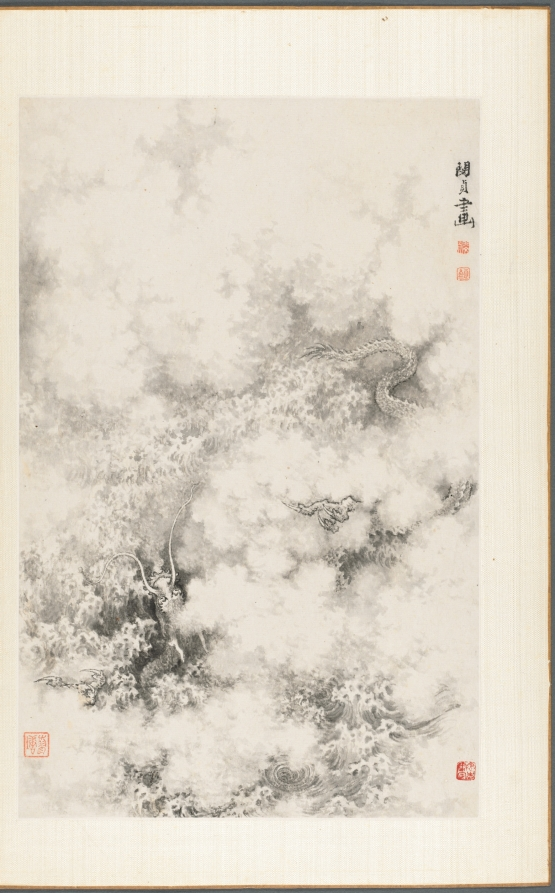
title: Dragon amid Clouds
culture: China, Qing dynasty (1644-1911)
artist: Min Zhen (Chinese, 1730–after 1788)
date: 1788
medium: album leaf, ink on paper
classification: Painting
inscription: Inscription by Min Chen on the last leaf: I have a habit of collecting strange rocks. My friend Tai-li shan-jen* treasures my paintings as much as I treasure strange rocks. Once we agreed to exchange what we love with each other. However, my busy activities have kept me from carrying this out. This summer I realized that this strange rock has been sitting in my studio for five years, so I painted this to fulfill my old promise. As a record, I chose the grotesque cliff in the last scene of this twelve-leaf album. Cheng-chai, Min Chen inscribed this on the sixth day of the sixth month [July 9] of the wu-shen year [1788]. * Tai-li shan-jen is Wang Li [tzu: Li-fu] tr. Hou-mei Ishida Six seals appearing on the leaves: Min Chen, Cheng-chai, Ching-ch'iao, Chen, Liao-t'ang, Min Chen chih-yin.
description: Min Zhen, who was orphaned at age 12 and developed an eccentric personality, was trained by Tang Yin (1682–1756), a writer, playwright, and superintendent of the imperial porcelain workshops in Jingdezhen. The connection to him may have enabled Min to stay in Beijing for a decade from around 1773. It is not clear whether he ever resided in Yangzhou, but his style is in many instances reminiscent of that of Yangzhou artist Huang Shen. This album demonstrates Min’s versatility and mature style in the last years of his life.